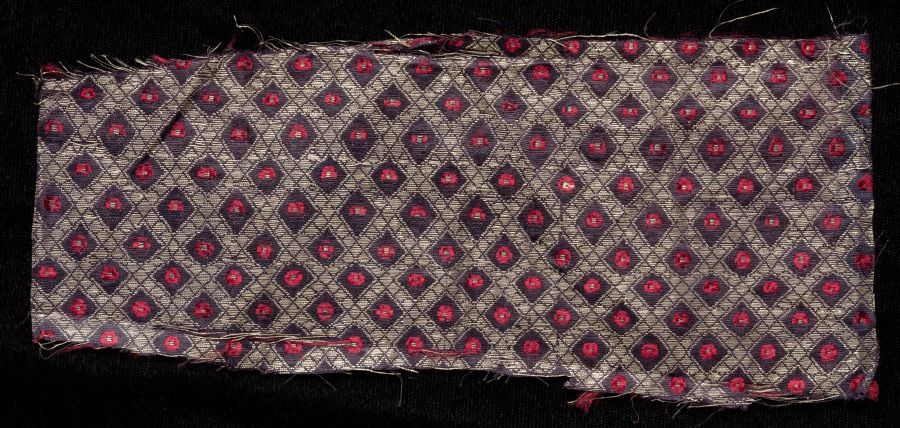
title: Fragment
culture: India, 19th century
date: 1800s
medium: brocade; silk, gold and silver threads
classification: Textile